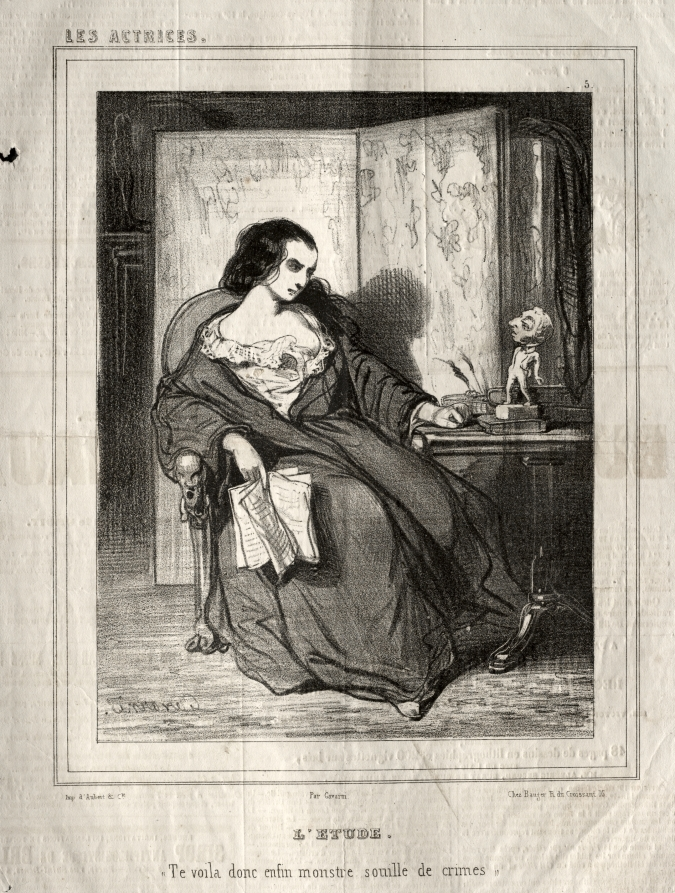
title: Les Actrices: L'Etude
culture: France, 19th century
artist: Paul Gavarni (French, 1804–1866)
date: 1843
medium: lithograph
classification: Print